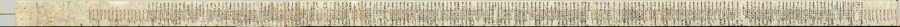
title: Scroll of Miscellaneous Notes written on a Calendar by Priest Seigen (verso)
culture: Japan, Kamakura period (1185–1333)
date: c. 1200–1231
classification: Manuscript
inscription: bears miscellaneous notes written by Priest Seigen.